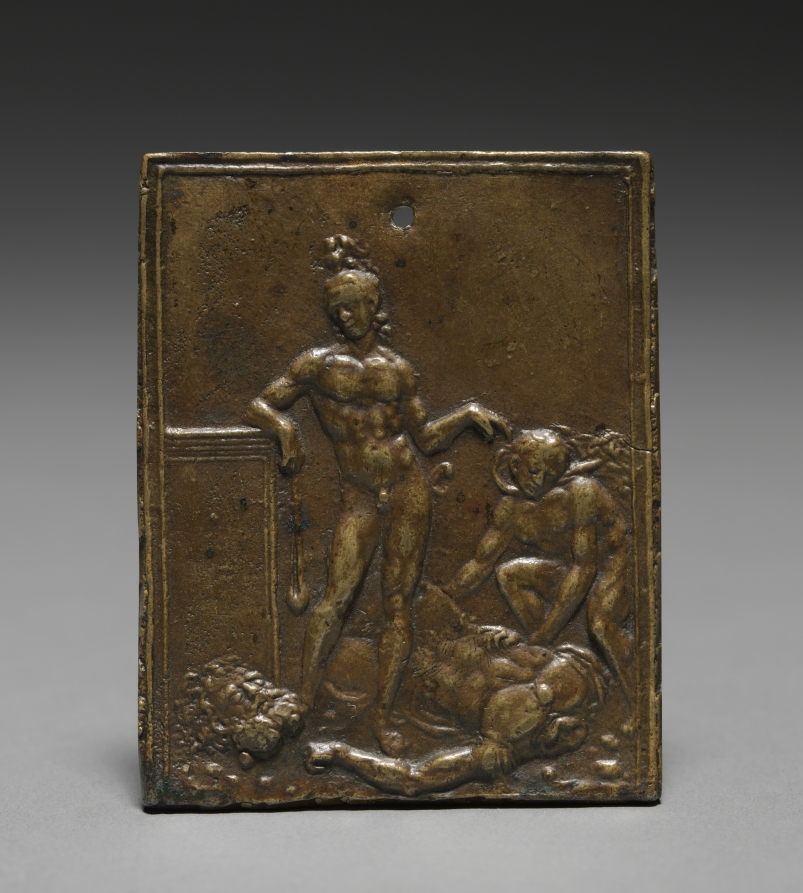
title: David Triumphant over Goliath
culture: Italy, late 15th-early 16th Century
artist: Moderno (Italian, 1467–1528)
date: late 1400s - early 1500s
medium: bronze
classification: Sculpture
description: A triumphant David, clad only in his helmet, stands next to the body of his opponent, the Philistine giant Goliath. David holds the sling that incapacitated the giant, allowing him to seize Goliath's sword and sever his head. On the right, a figure, possibly David's friend Jonathan, holds Goliath's body, while his severed head rests at David's feet. As his pseudonym may indicate, Moderno operated at the forefront of the classical revival in the early 1500s. David's body especially owes much to the classical tradition, with heroic frontal nudity that recalls ancient sculptures of ideal youths. The distinct lack of ornament, and the bold use of empty space characterize Moderno's style, where, instead of simply recreating classical prototypes, he reinterpreted and shifted them to produce dramatic compositions.